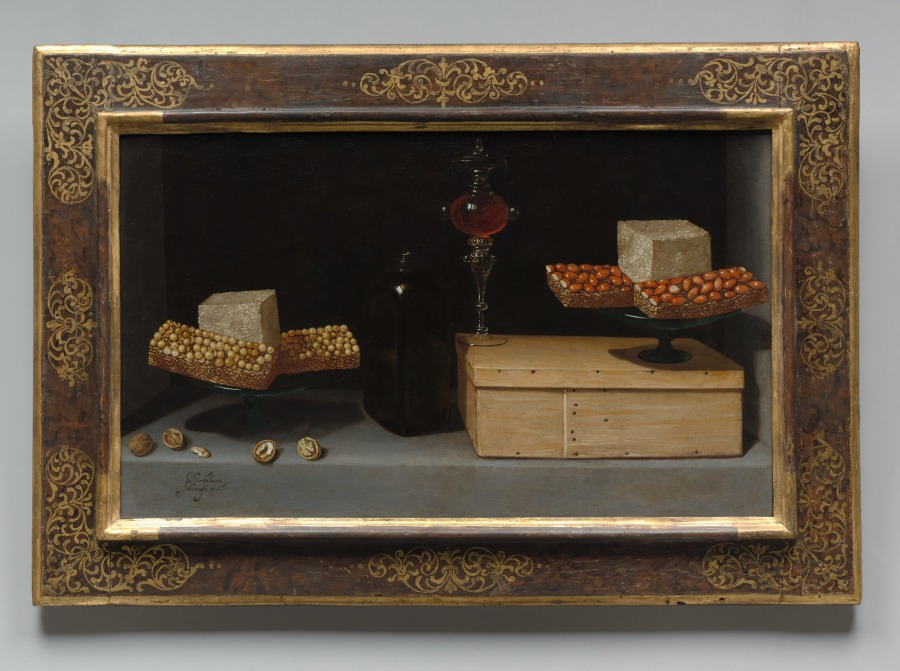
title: Still Life with Sweets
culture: Spain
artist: Juan van der Hamen y Léon (Spanish, 1596–1631)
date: 1622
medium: oil on canvas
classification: Painting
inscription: Signed lower left: "Ju Vander Hamen/ de Leon fa[t], 1622"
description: Placed on a simple stone ledge, this bold arrangement includes a wooden box, a dark glass bottle, some walnuts, an elaborate Venetian glass, and several sweets called turrones. These delicacies are a mixture of pine nuts, honey, almonds, and hazelnuts. The picture may not represent an actual meal or snack. Rather, the artist played with contrasts and harmonies of shapes, textures, and colors. During his short career van der Hamen, whose father was from the Netherlands, worked at the Spanish royal court and created biblical pictures, history paintings, allegories, and landscapes. He is best known for his portraits and still lifes.